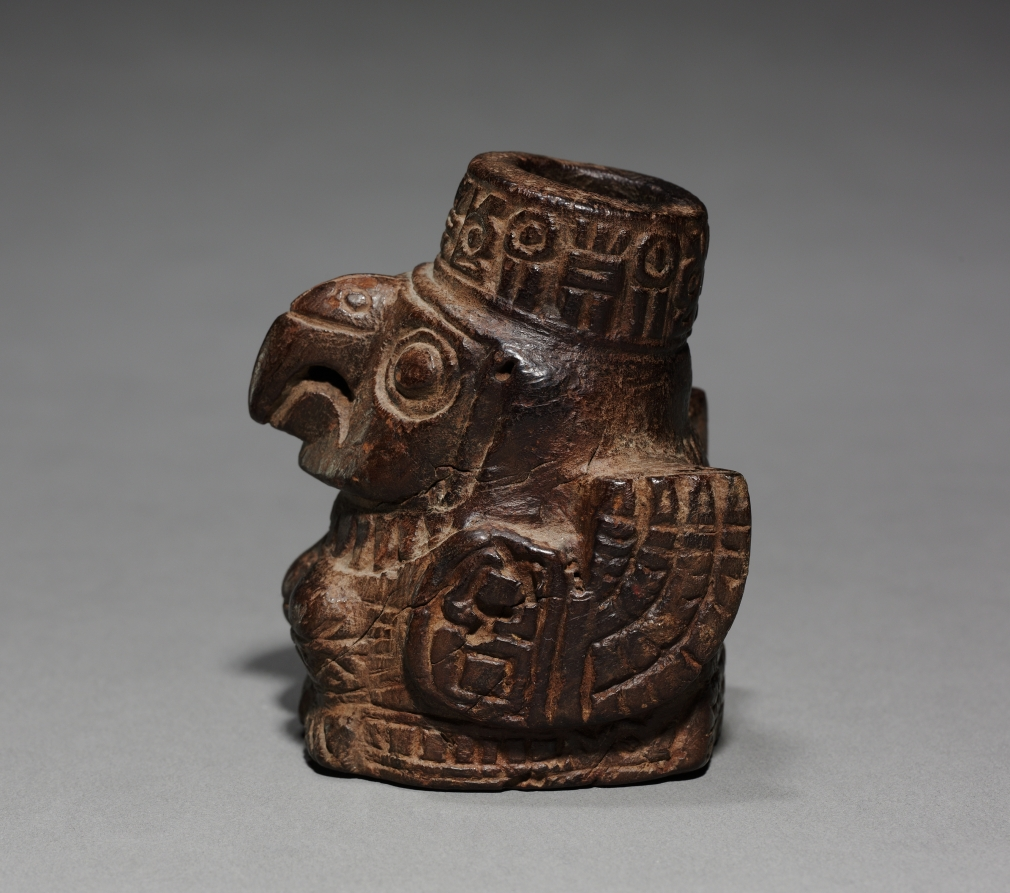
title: Bird-Shaped Container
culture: Peru, Wari style (500-900)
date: 500–900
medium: wood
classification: Sculpture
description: Peruvian Indians today regard coca leaf as a sacred substance that creates communion with deities. The leaves are chewed with powdered lime that in antiquity was stored in containers and scooped with spatulas like those seen here. Aside from its ritual meaning, coca has practical benefits: it is vitamin-rich and, like coffee, induces clear-headedness. The lizard spatula is Nasca; the other two are Wari.